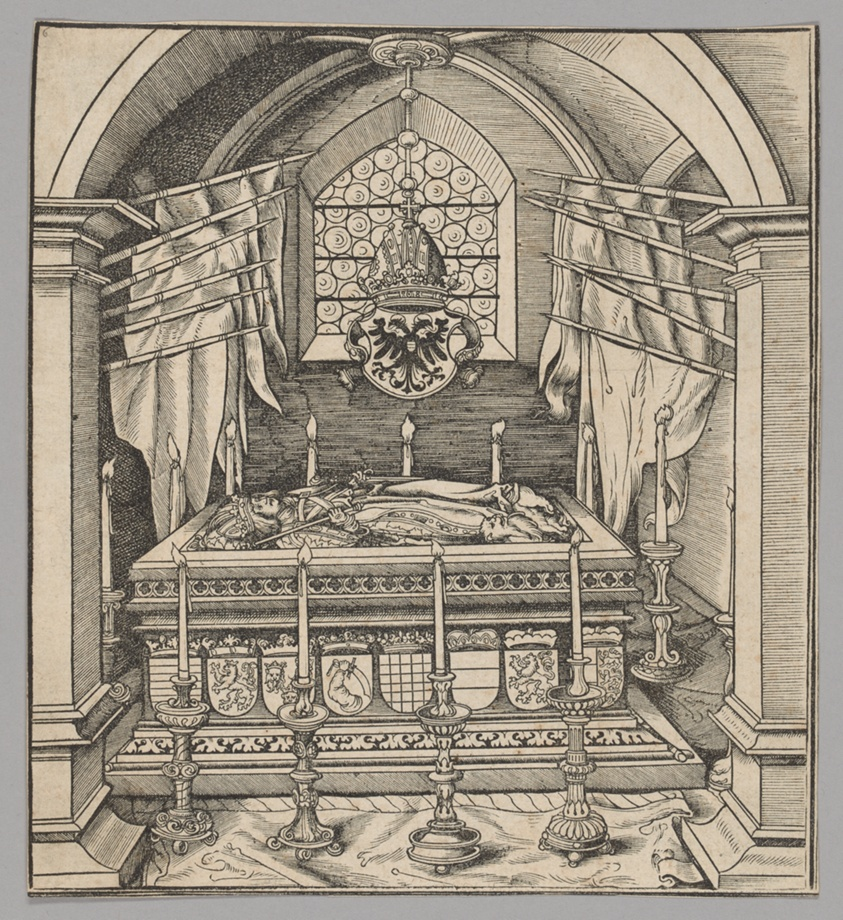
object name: Print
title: Gruftblatt, plate 24 from Historical Scenes from the Life of Emperor Maximilian I from the Triumphal Arch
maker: Hans Burgkmair the Elder (German, 1473-1531); printed by Hieronymus Andreae (German, died 1556)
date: 1515-17, printed c. 1520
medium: Woodcut in black ink on cream laid paper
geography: Germany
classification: print; paper; woodcut; prints and drawing